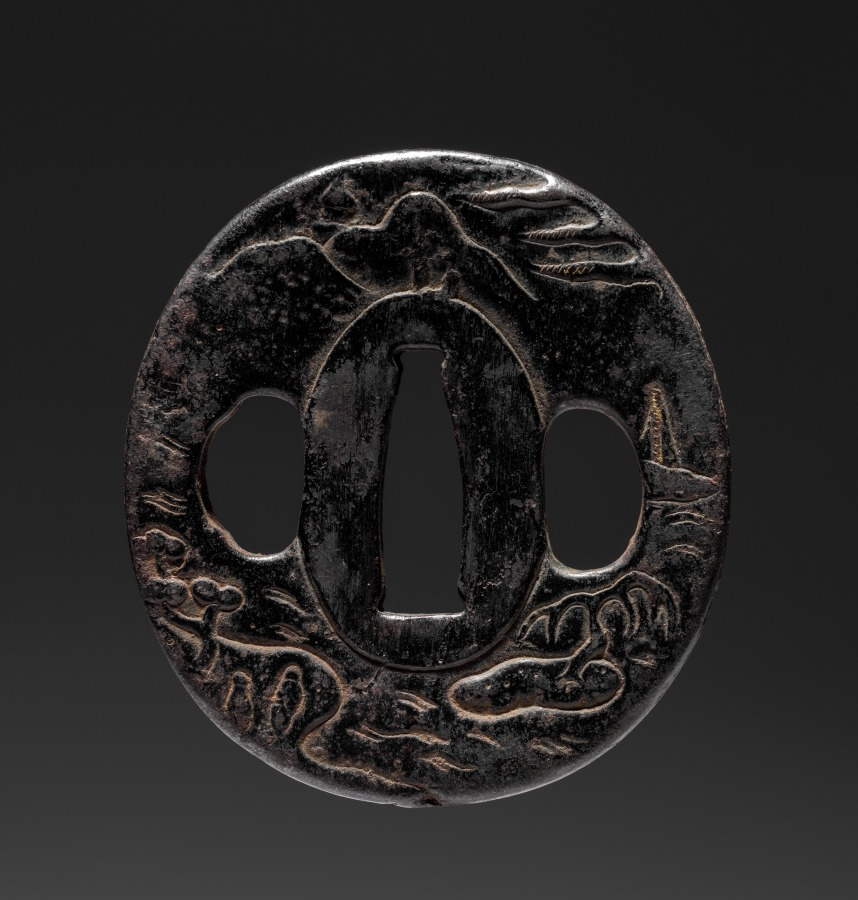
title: Sword Guard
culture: Japan, Edo period (1615–1868)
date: late 1600s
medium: iron (Jakushi type)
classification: Arms and Armor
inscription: signed "Jakushi."